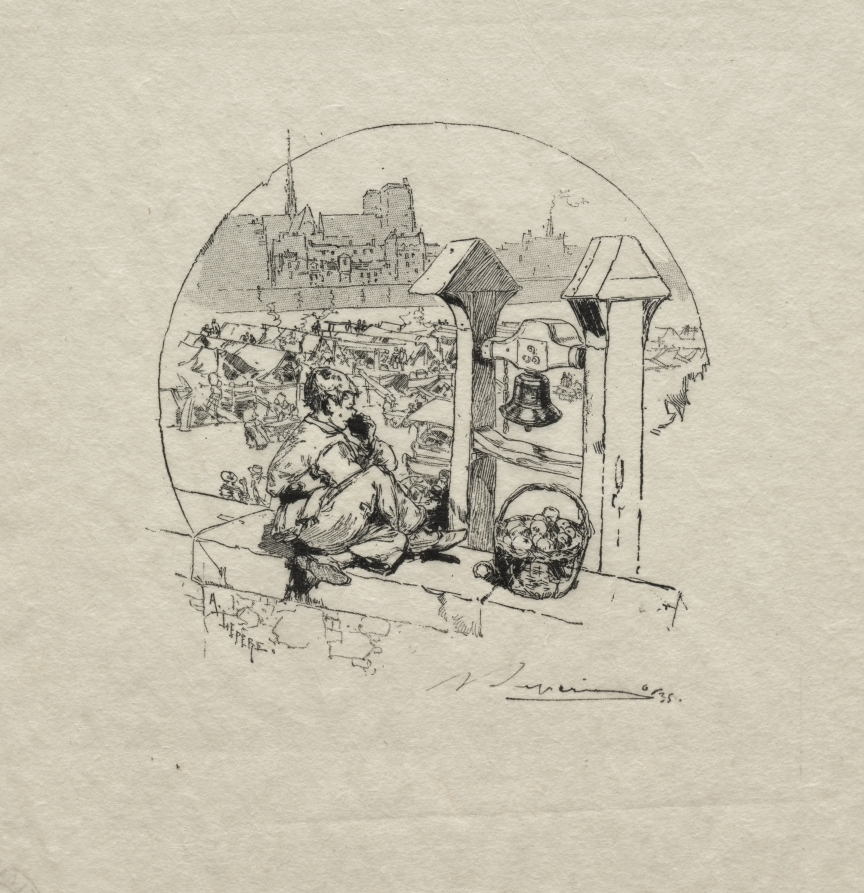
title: Marché aux Pommes, No. 2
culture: France, 19th-20th century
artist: Auguste Louis Lepère (French, 1849–1918)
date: c. 1870–1918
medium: wood engraving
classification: Print